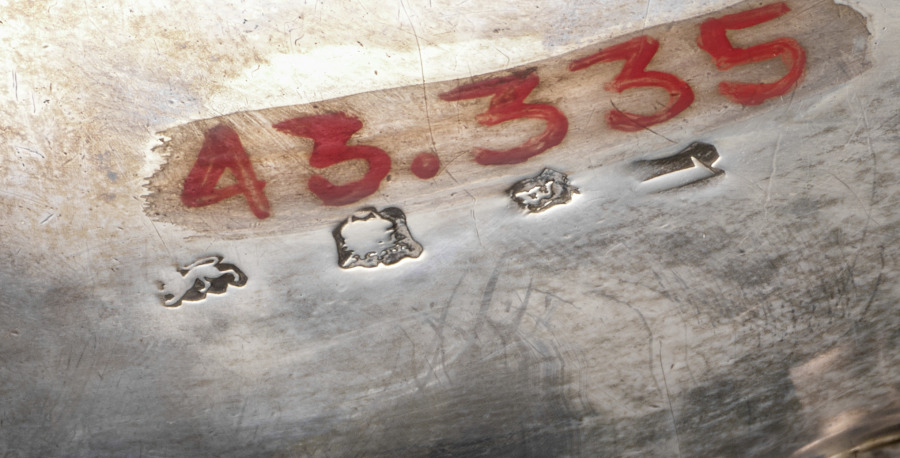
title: Gravy Boat (2 of 2)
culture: England, 18th century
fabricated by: Samuel Wood (British)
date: 1746–1747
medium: silver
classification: Silver